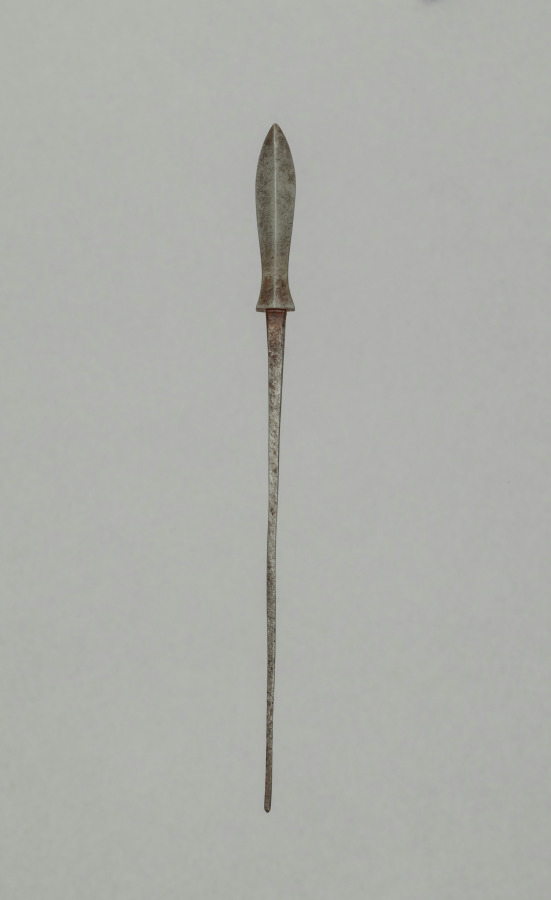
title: Arrow Point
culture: Japan, Edo period (1615–1868)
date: 1700s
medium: steel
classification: Arms and Armor